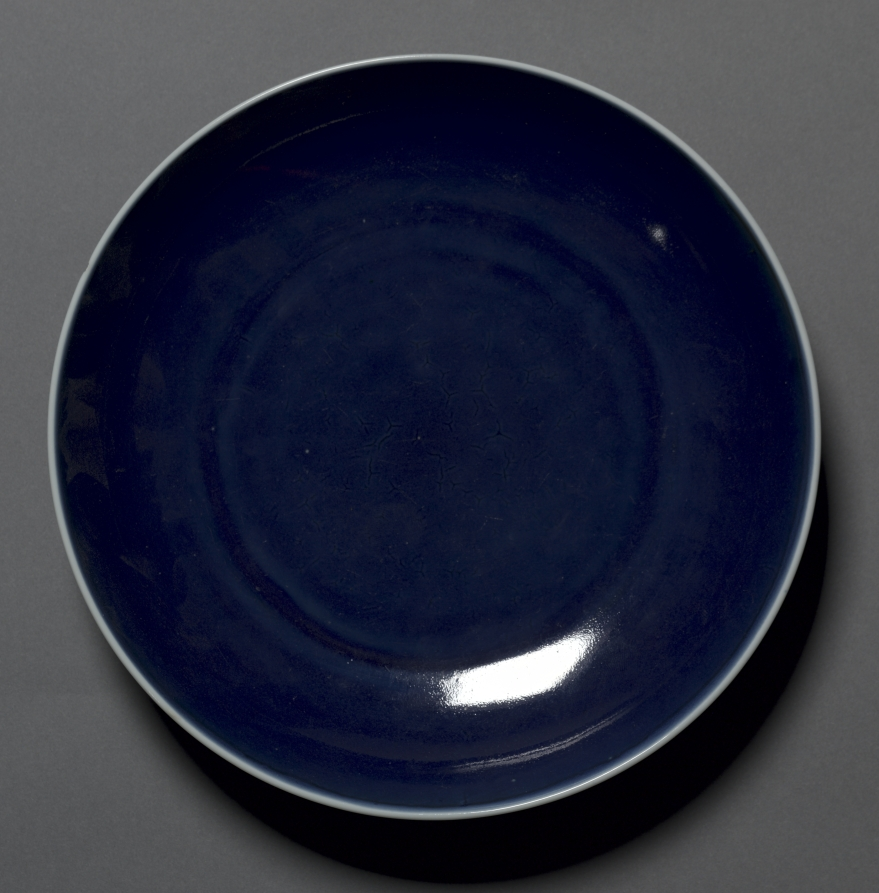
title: Dish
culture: China, Jiangxi province, Jingdezhen kilns, Ming dynasty (1368-1644), Xuande mark and period (1425-1435)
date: 1426–35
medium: porcelain with blue glaze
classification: Ceramic